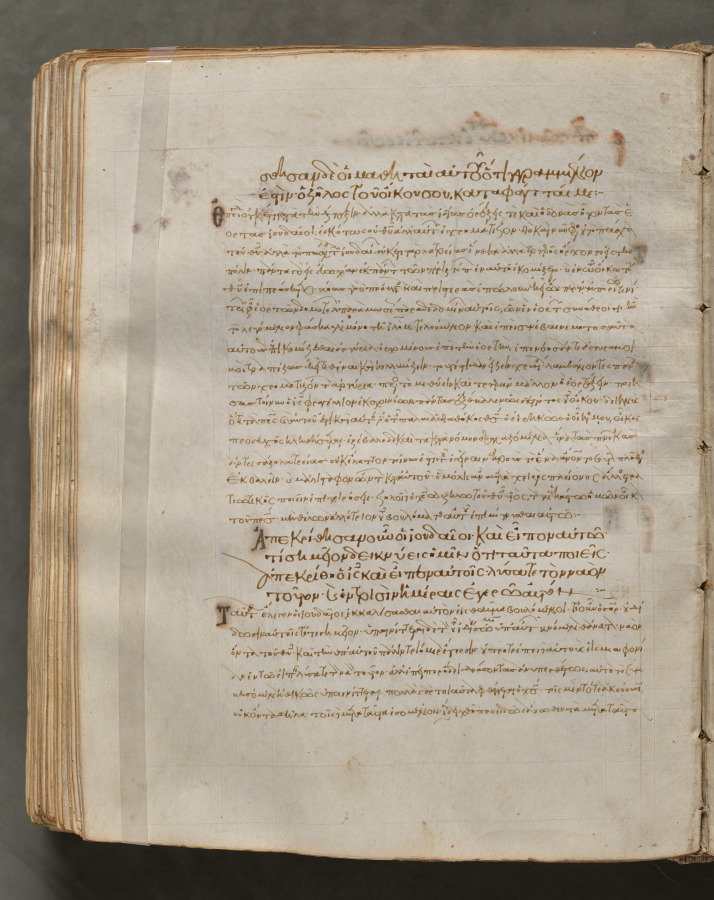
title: Text, folio 331 (verso), from a Gospel Book with Commentaries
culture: Byzantium, Constantinople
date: c. 1000–1100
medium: ink, tempera, and gold on vellum; leather binding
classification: Bound Volume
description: Each of the four gospels in this book opens on a page with brilliantly illuminated borders depicting the author of the text as well as birds—principally peacocks, symbols of the immortality of the soul—and fountains, representing the fountain of life and the salvation of the soul. This volume consists of 428 leaves with texts in Greek. Its level of sophistication suggests that it was probably written and decorated in a monastery in Constantinople.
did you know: Gospel books were carried in procession through Byzantine churches.